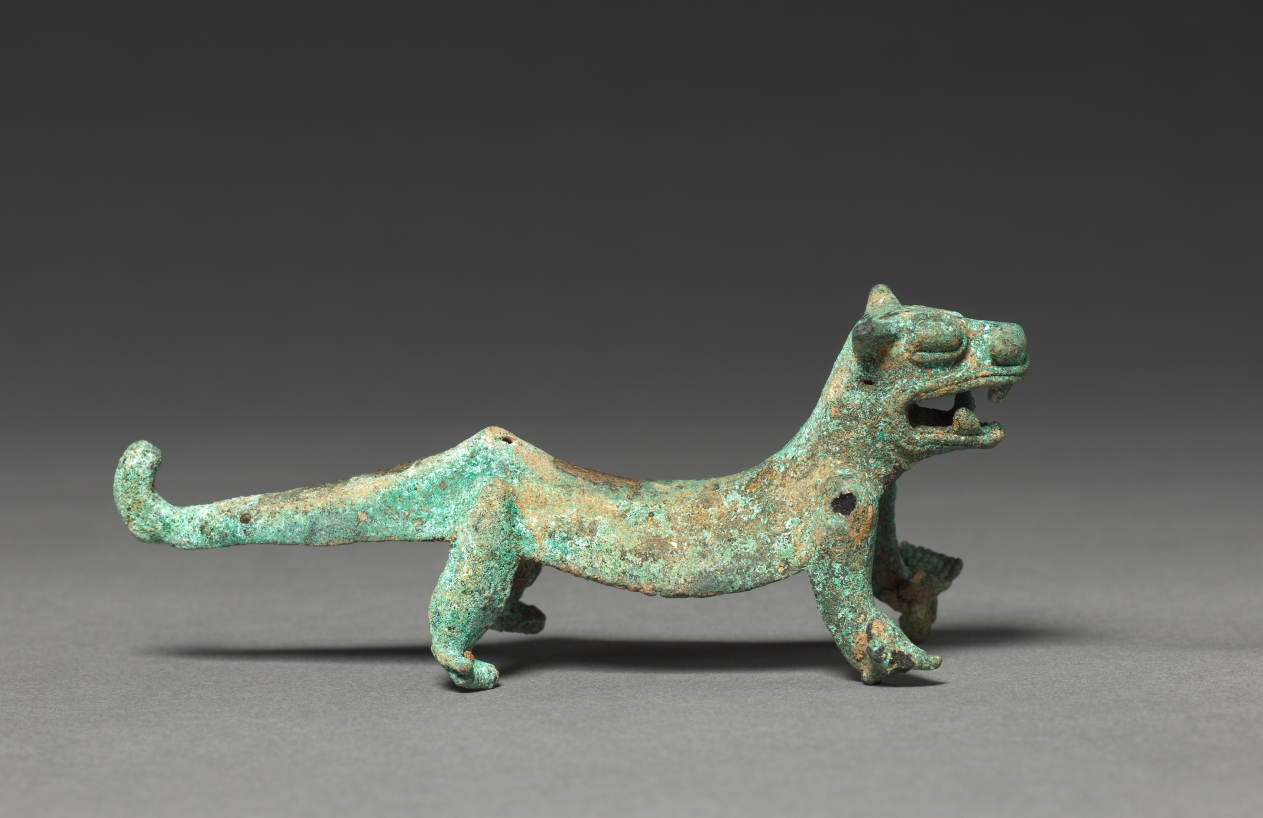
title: Jaguar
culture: Costa Rica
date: c. 1000–1500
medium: gold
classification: Metalwork